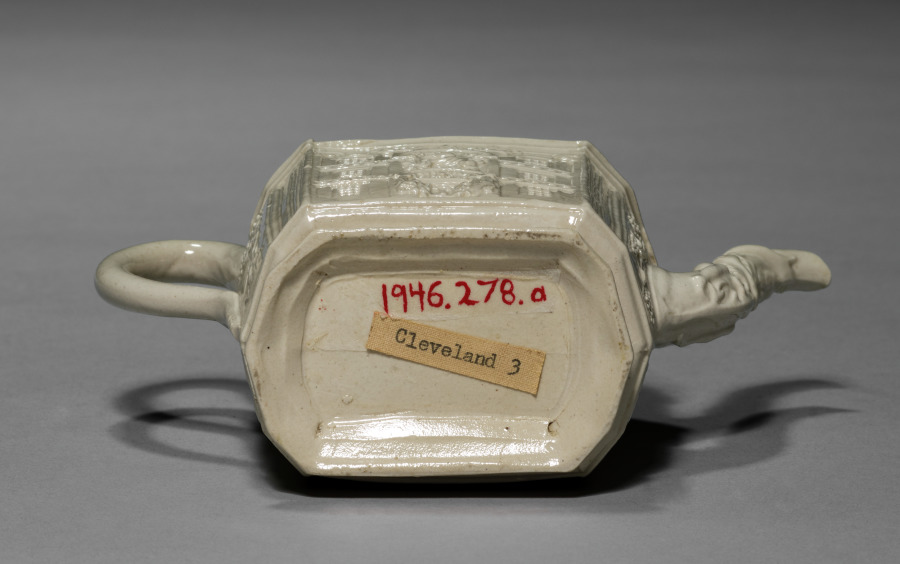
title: Teapot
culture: England, Staffordshire, 18th century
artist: Staffordshire Factory (British)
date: c. 1745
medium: salt-glaze earthenware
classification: Ceramic